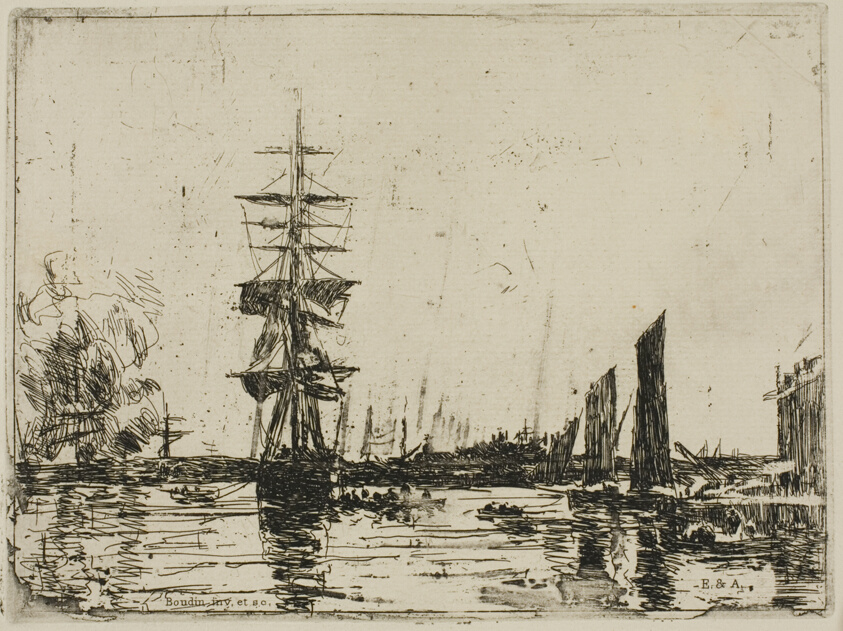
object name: Print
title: Seascape with Boats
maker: Eugène Louis Boudin (French, 1824-1898)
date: 1898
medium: Etching on ivory laid paper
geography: France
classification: etching; print; prints and drawing